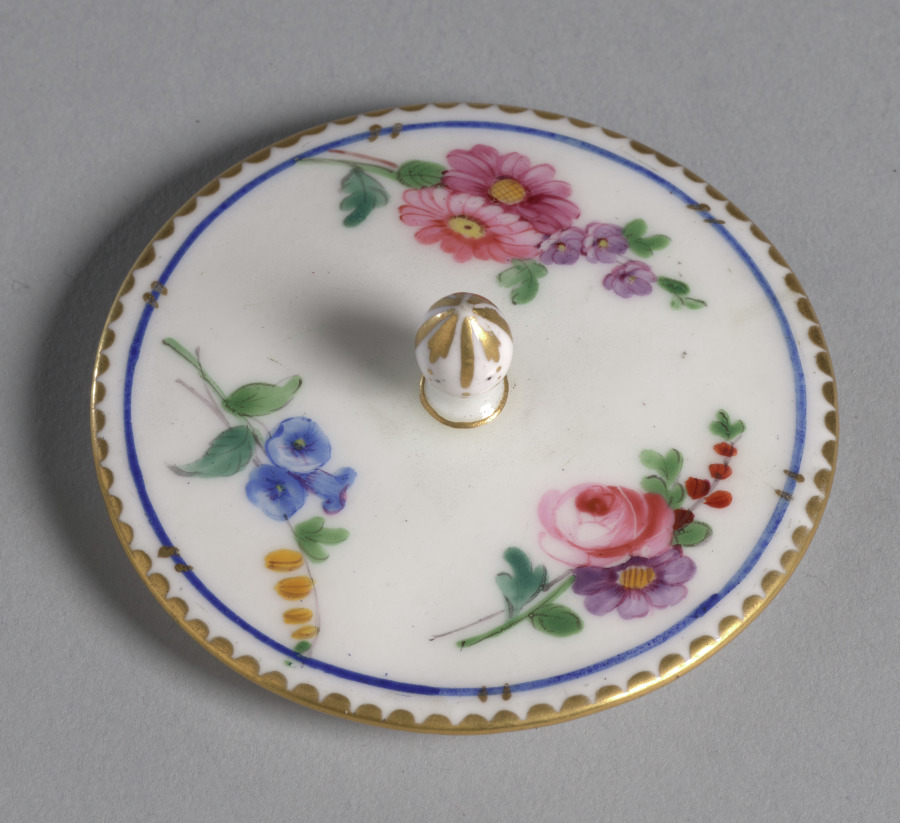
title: Jam Pots on Stand (lid)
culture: France, 18th century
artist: Sèvres Porcelain Factory (French, est. 1756)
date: c. 1760's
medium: porcelain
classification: Ceramic